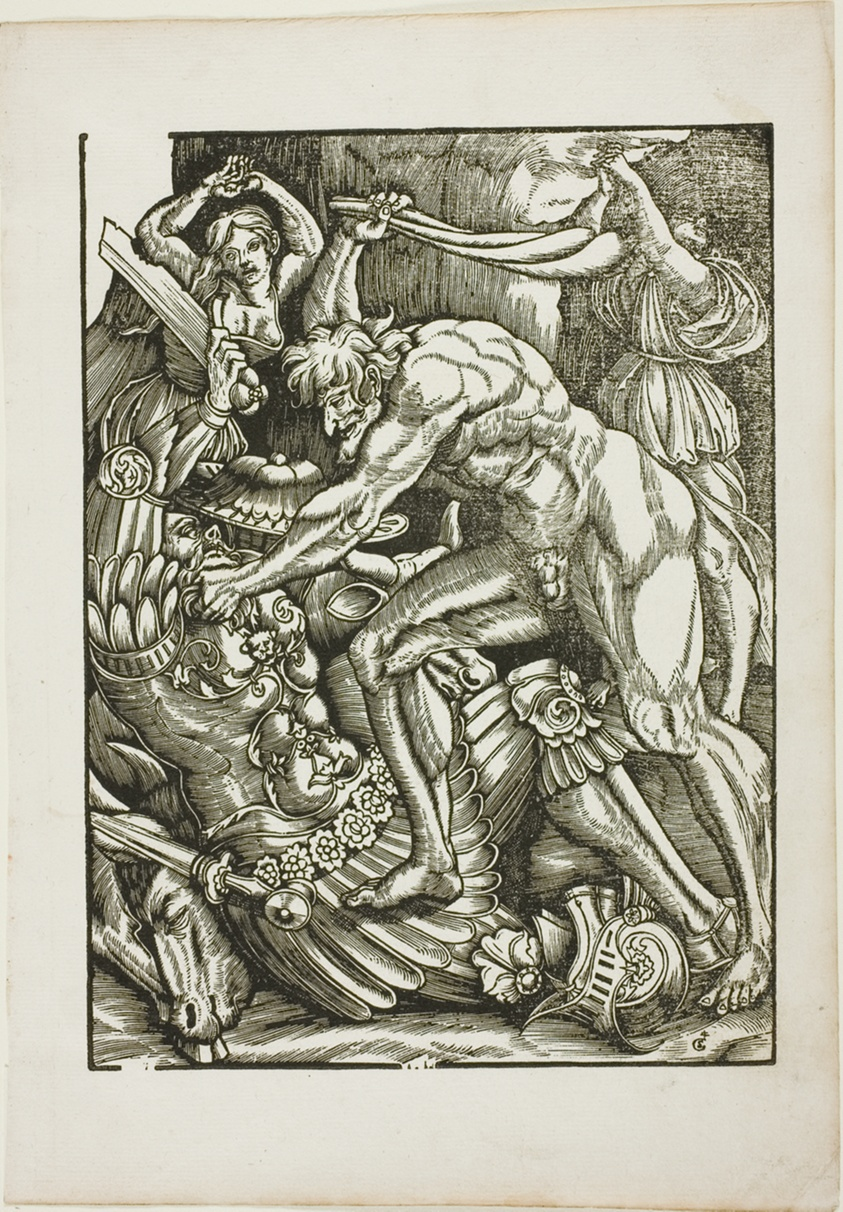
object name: Print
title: The Labors of Hercules: Hercules and Cacus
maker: Gabriel Salmon (French, active 1504-1542)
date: c. 1528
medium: Woodcut on paper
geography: France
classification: woodcut; print; prints and drawing